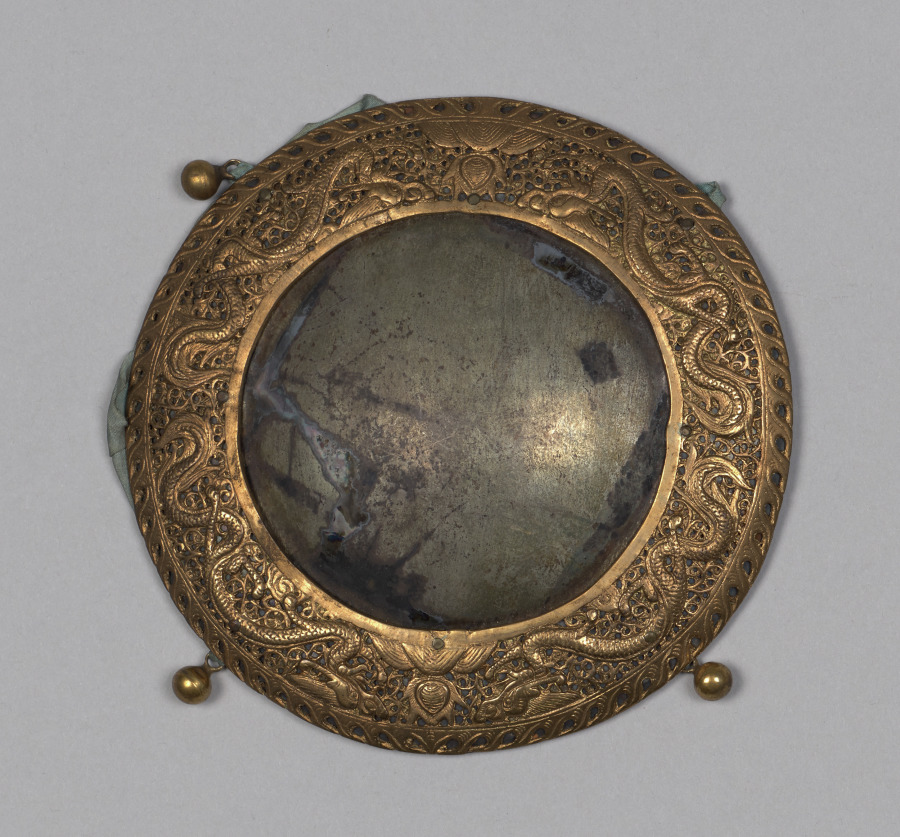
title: Ceremonial Uniform: Front Metal Plate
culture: China, Qing dynasty (1644-1911)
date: 1644–1911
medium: metal (brass?); lined in blue silk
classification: Arms and Armor